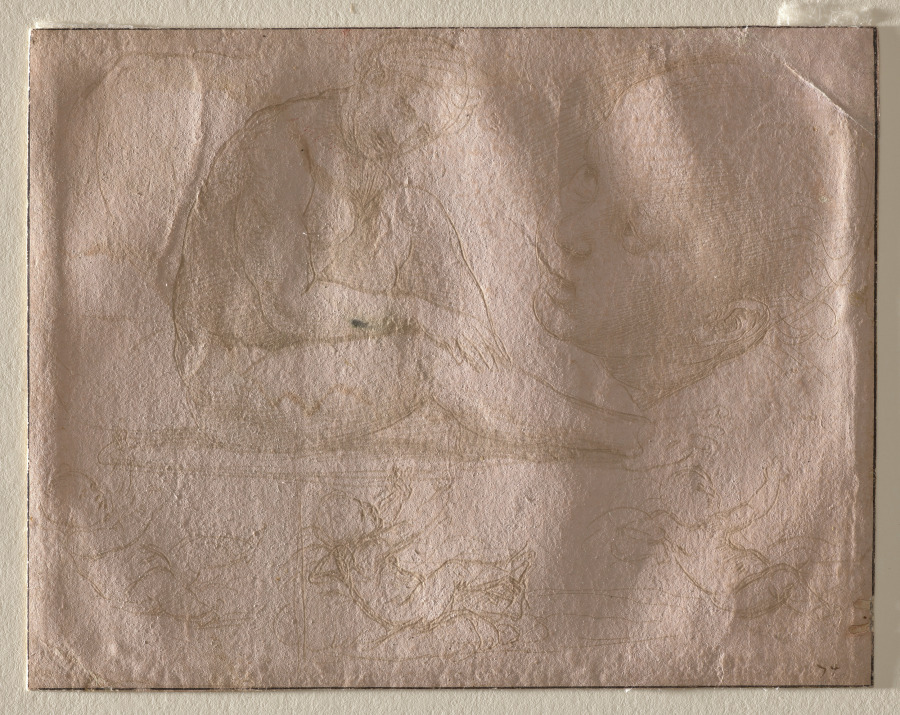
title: Studies of a Seated Female, Child's Head, and Three Studies of a Baby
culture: Italy, 16th century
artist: Raphael (Italian, 1483–1520)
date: c. 1507–8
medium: metalpoint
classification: Drawing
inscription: lower right, in brown ink: 74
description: This drawing is from Raphael’s "pink sketchbook," comprised of ten sheets of roughly equal size that each portray variations of a mother and child. Today, six of the drawings at the Palais des Beaux-Arts, Lille; two are at the British Museum; one is in a private collection; and one is in Cleveland. The small format of the sheets would have enabled the artist to carry the notebook as he traveled from Florence to Rome in 1508. Raphael used metalpoint, a technique popular in 15th- and early 16th-century Italy on a pink prepared surface. The pose of the infant's head in the drawing was based on that of the Christ child in Leonardo da Vinci's Benois Madonna, then in a private collection in Florence, with changes—such as the uplifted eyes and open mouth—made by Raphael. The curving back of the female nude is echoed in the roundness of the child's head. The three sketches of a reclining infant at the bottom of the sheet are freely handled and improvisational, relaying the child's squirming, continuous movement with repeated contour lines.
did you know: This sheet was probably once part of a sketchbook carried by the artist Raphael on a 1508 journey between Florence and Rome.